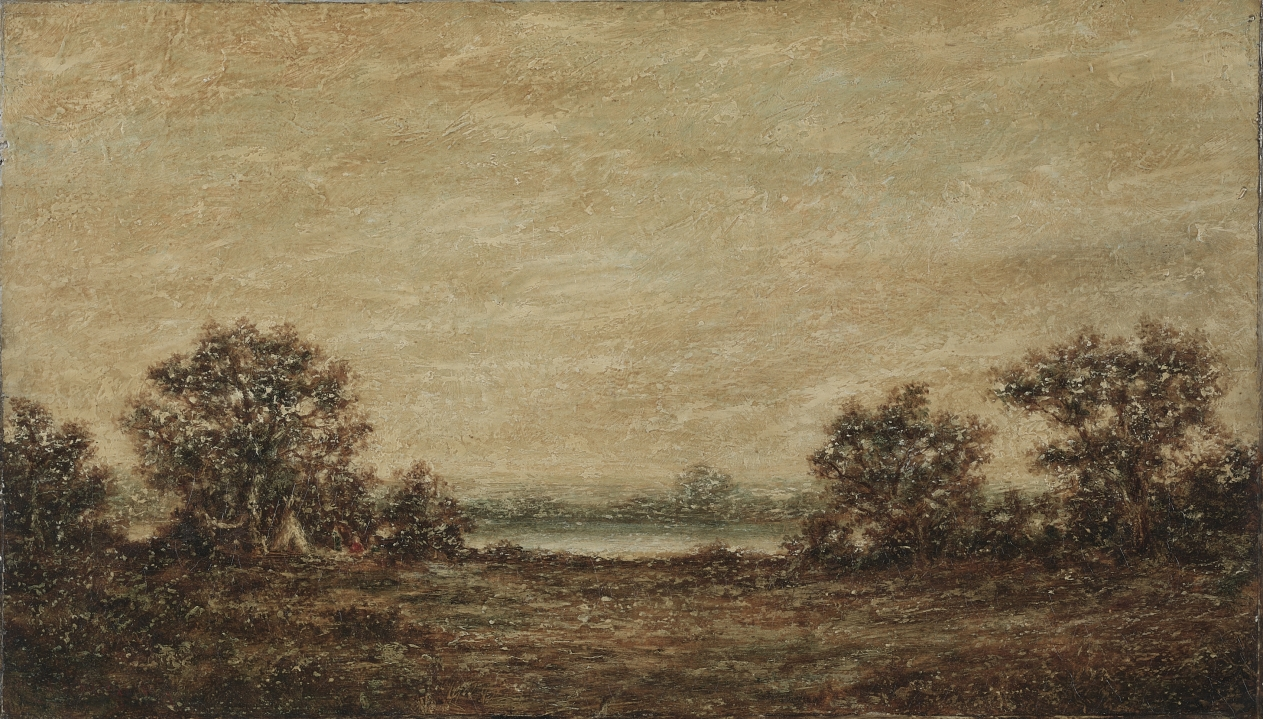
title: Yellow Light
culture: America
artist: Ralph A. Blakelock (American, 1847–1919)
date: before 1905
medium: oil on canvas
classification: Painting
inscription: signed lower left: R. A. Blakelock